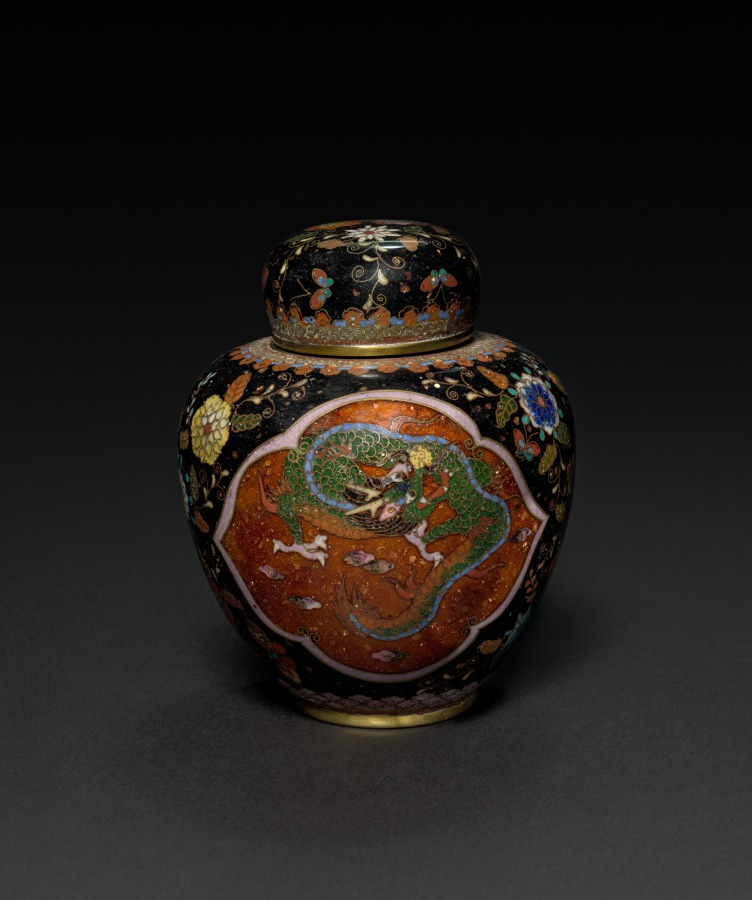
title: Ginger Jar with Phoenix and Dragon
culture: Japan, Meiji period (1868–1912) or Taishō period (1912–26)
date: early 1900s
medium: cloisonne enamel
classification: Enamel